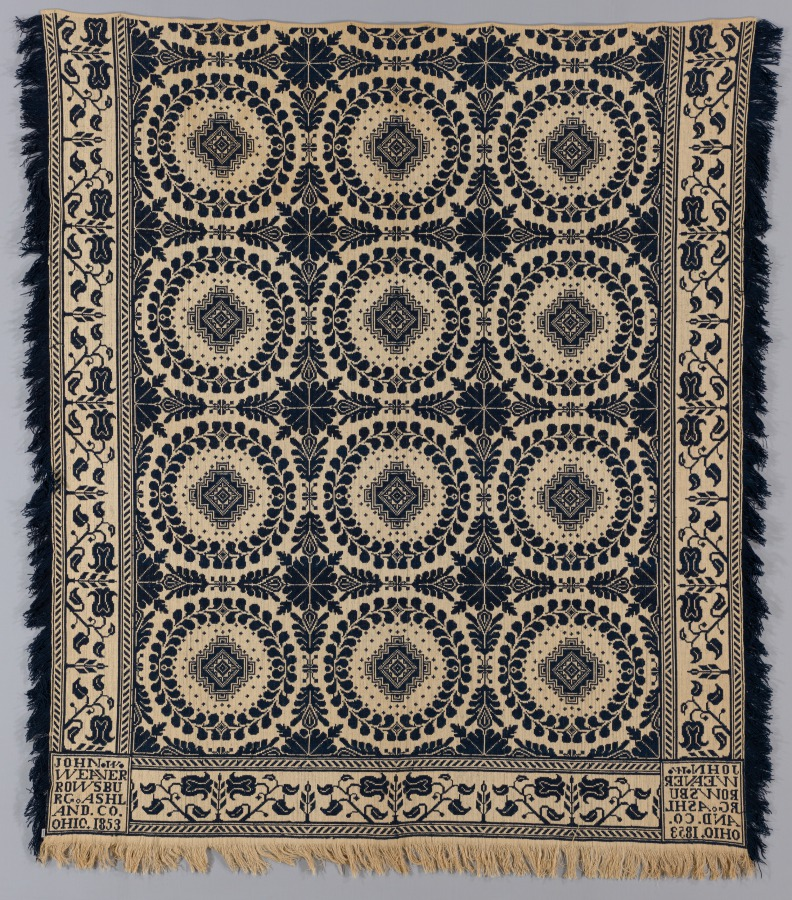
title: Coverlet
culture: America, Ohio, Ashland County, Rowsburg, 19th century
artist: John W. Weaver (American)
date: 1853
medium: compound weave: wool and cotton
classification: Textile